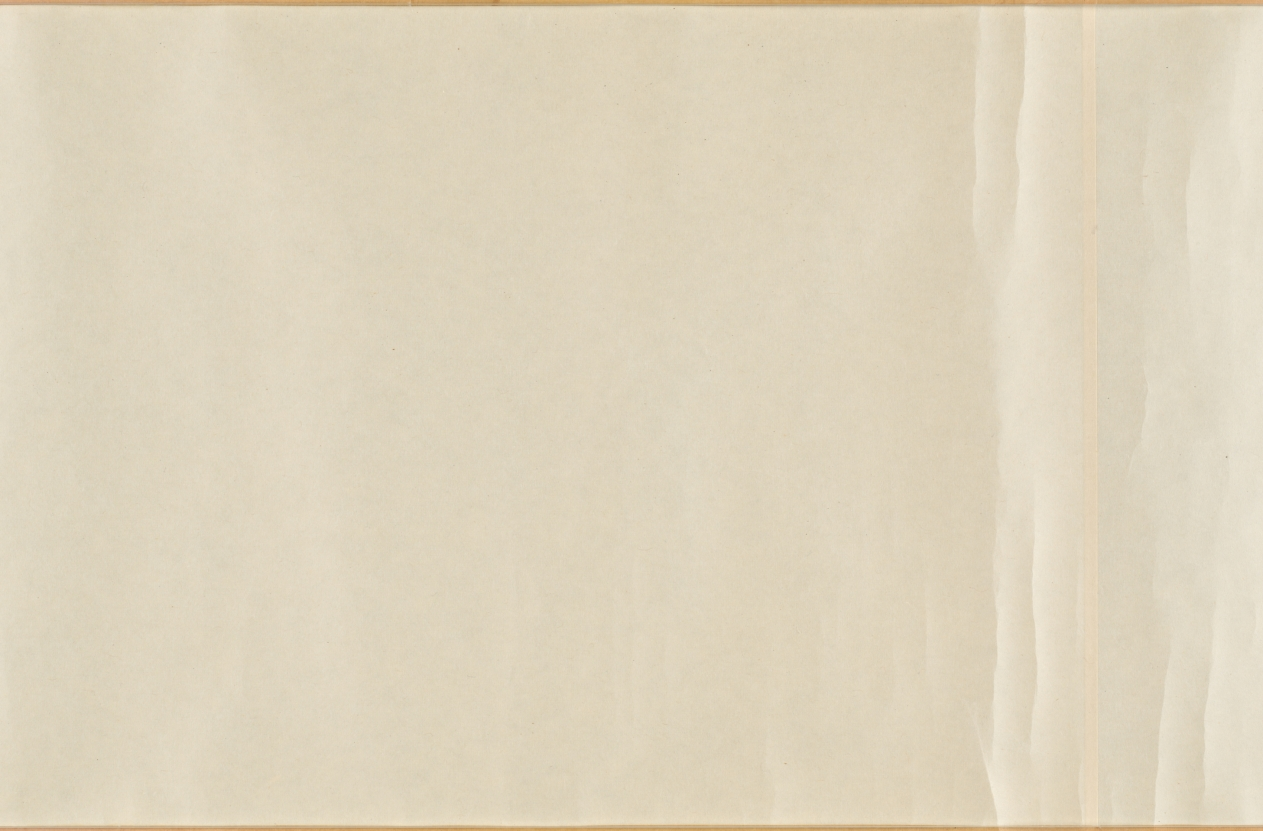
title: Selections from the New Collection of Japanese Poems from Ancient and Modern Times (Shinkokin wakashū) with Printed Designs of Chinese Lions and Crab Finger Grass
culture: Japan, Edo period (1615–1868)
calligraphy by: Hon'ami Kōetsu (Japanese, 1558–1637)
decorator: Tawaraya Sōtatsu (Japanese, c. 1570–c. 1640)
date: early 1600s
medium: handscroll; ink, gold, and silver on paper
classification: Calligraphy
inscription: Seal: 光悦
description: Hon’ami Kōetsu was a calligrapher and craftsman who frequently collaborated with the painter Tawaraya Sōtatsu, considered the first master of the Rinpa school. Kōetsu brushed seven poems from the autumn section of a poetry anthology onto dyed paper with motifs designed and printed in gold and silver by Sōtatsu.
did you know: Before becoming a master painter of screens, Tawaraya Sōtatsu painted fans.